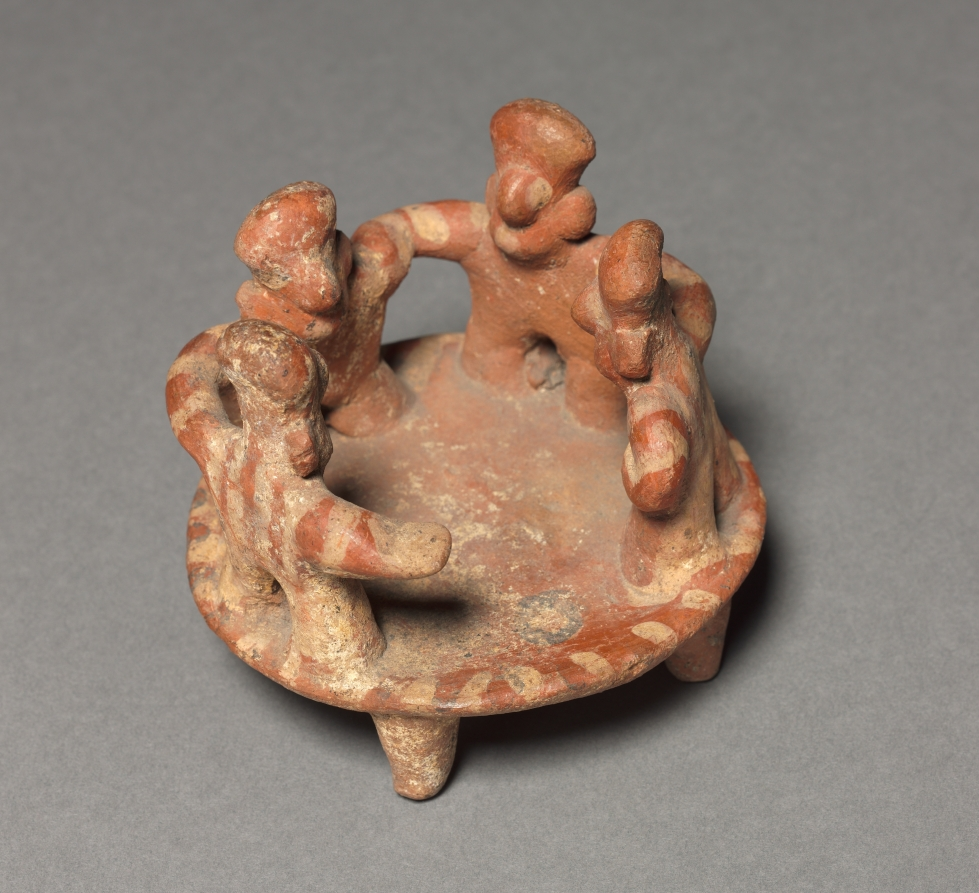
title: Dancing Group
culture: Mexico, Western Nyarit, 5th-6th Century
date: 400s-500s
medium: terracotta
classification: Sculpture